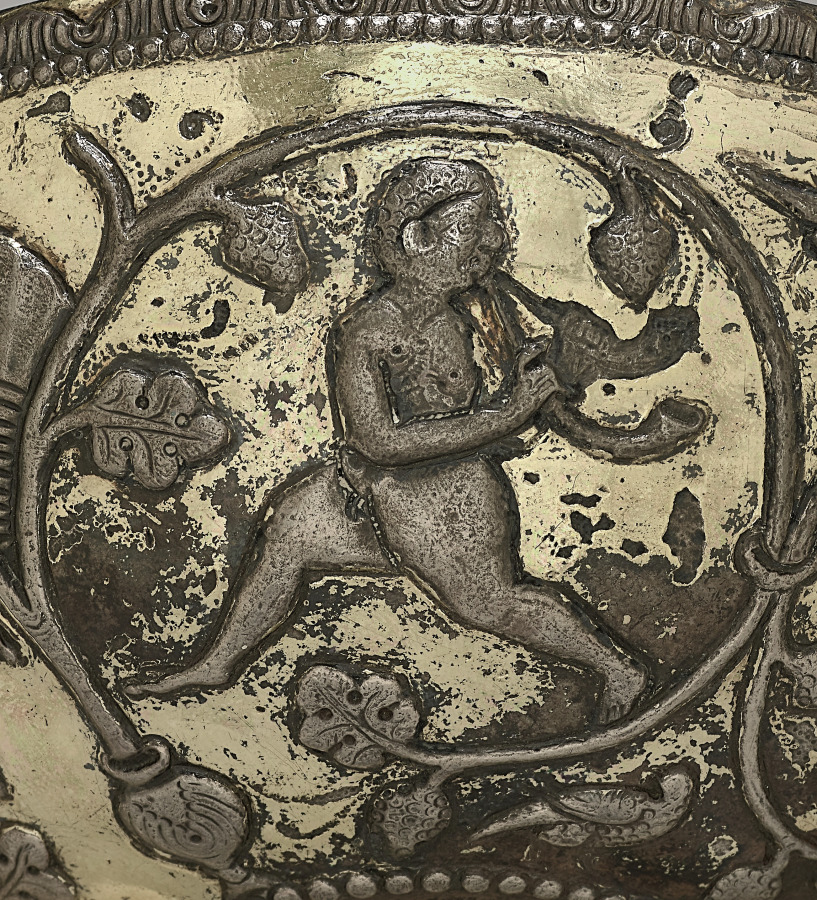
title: Bowl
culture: Iran, Sasanian Empire (224–651 CE)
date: 500–700 CE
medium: silver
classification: Metalwork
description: Every good Zoroastrian was supposed to spend one-third of his day farming; one-third philosophizing; and one-third eating, resting, and at pleasure. The abundance of Sasanian luxury goods is evidence of the importance accorded the last third of the day.